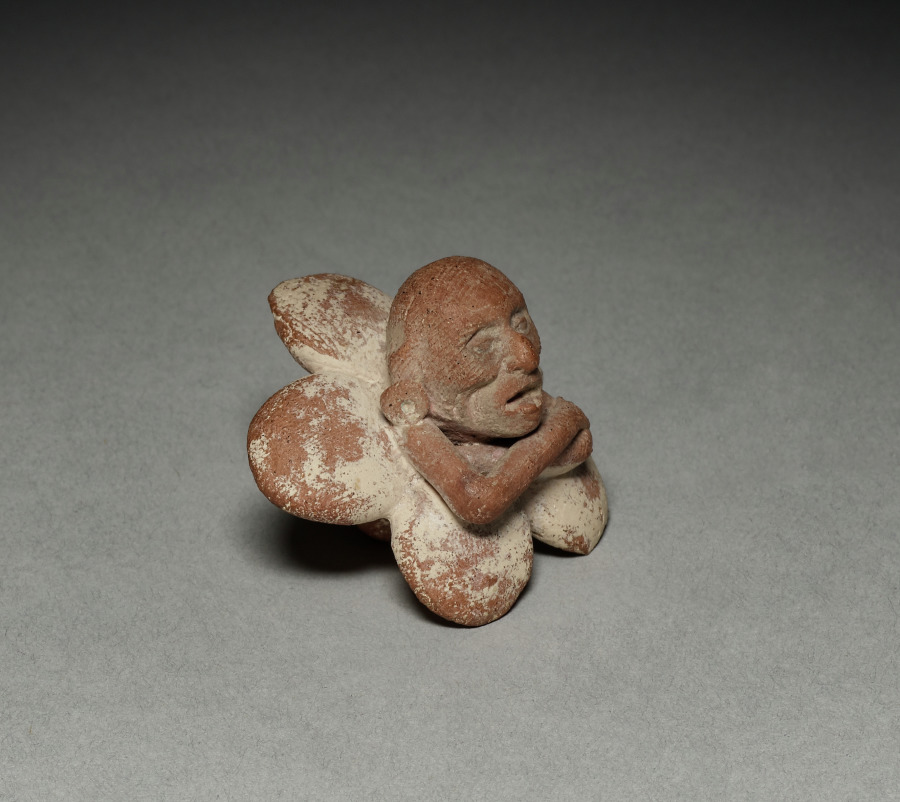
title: Figure in Flower Ornament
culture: Mexico, Yucatán, Jaina Island region, Campeche, Maya style (250-900)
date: 500–900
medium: earthenware with slip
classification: Jewelry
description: Figures within flowers are one of the most enchanting themes of the Maya ceramic art of Jaina, an island off the western Yucatán coast. The figures, usually males who cross their arms over their bodies, are either radiantly youthful or aged (as here), suggesting a relationship to the life cycle.